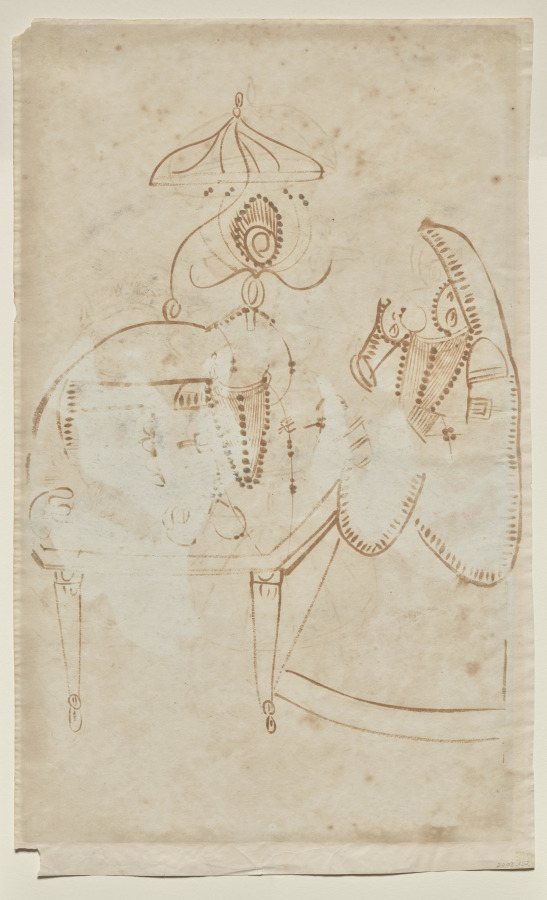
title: Rama and Sita enthroned with Lakshmana and Hanuman attending, from a Kalighat album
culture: Eastern India, Bengal, Kolkata, Kalighat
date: c. 1890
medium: Gum tempera, graphite, tin, and ink on paper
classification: Painting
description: Rama and Sita sit enthroned under a royal parasol held by Rama’s brother Lakshmana. A diminutive Hanuman kneels before them in adoration. The stunning mix of vibrant color animates the otherwise static scene. The local Indian artists who created inexpensive paintings for visitors to the temple at Kalighat were accustomed to creating rapid watercolor paintings with collapsed perspectives and flat backgrounds. Since their workshops were near the British colonial capital of Calcutta (now Kolkata), they were aware of British fashions, such as the Prince Albert mustache.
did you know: Rama wields the divine bow of Vishnu, which is why he is shown with an arrow in his right hand.